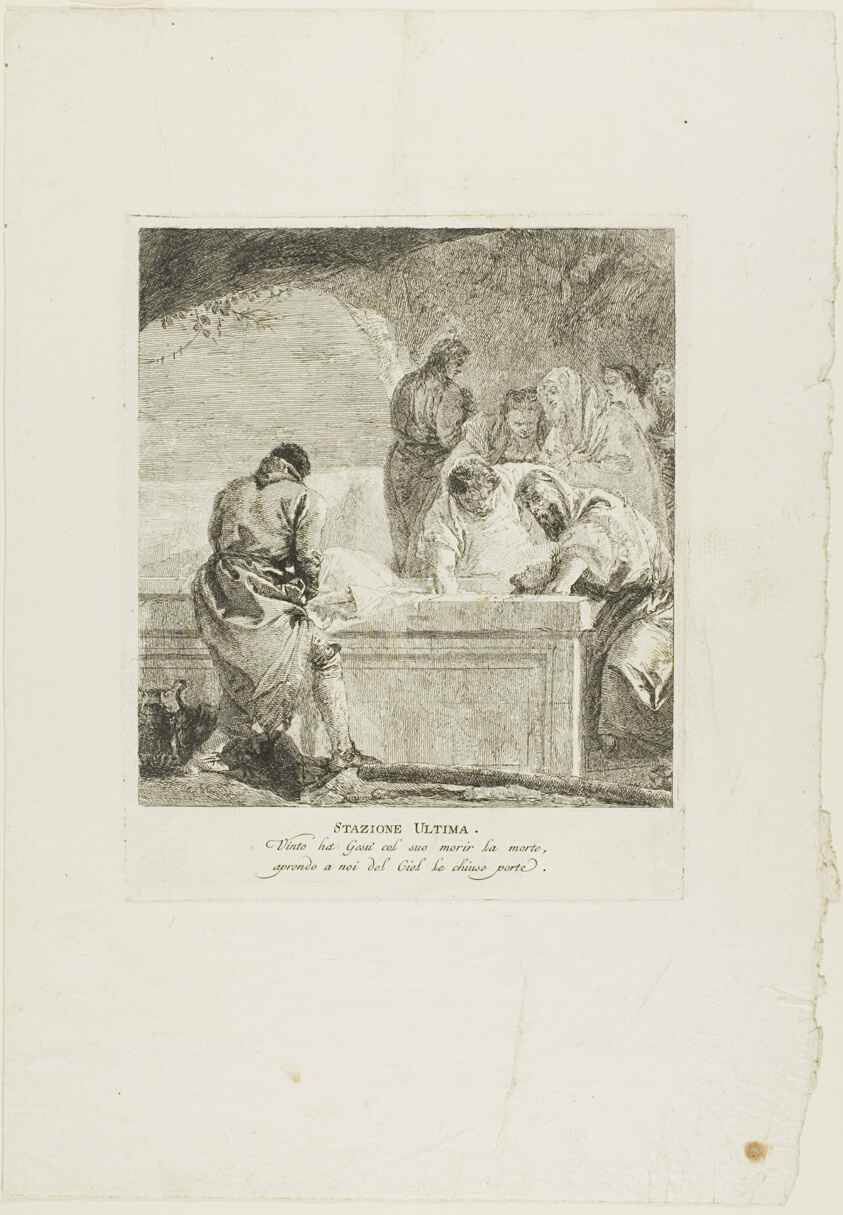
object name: Print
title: The Entombment, plate fourteen from Stations of the Cross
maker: Giovanni Domenico Tiepolo (Italian, 1727-1804)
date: c. 1748, published 1749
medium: Etching on paper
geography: Italy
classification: etching; print; prints and drawing